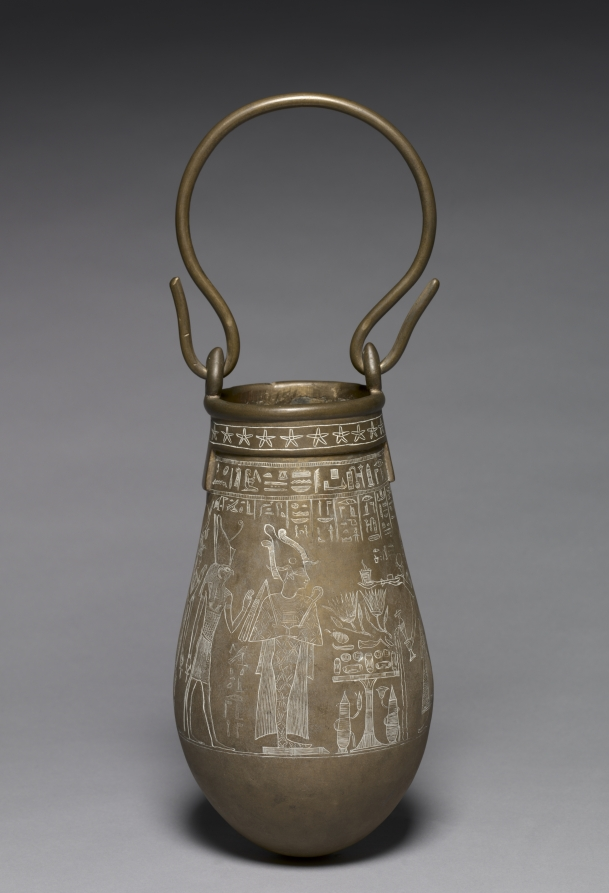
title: Decorated Situla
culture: Egypt, Greco-Roman period (332 BCE–395 CE), Ptolemaic dynasty (305–30 BCE)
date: 305–30 BCE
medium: bronze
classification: Vessels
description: The situla was a deluxe ritual vessel that played an important role in Egyptian religious ceremonies. The two scenes on this situla exemplify the dual roles of a pious Egyptian in the afterlife: receiving offerings from his family on the one hand and making offerings to the gods on the other. On one side of the vessel the deceased, Padiamennebnesuttawy ("He who Amen, lord of Karnak, gives"), sits in a low chair accompanied by his pet dog. The vertical, cross-shaped sign preceding the animal is his name, Nefer, meaning "good one" or "beautiful one." On the right, the deceased's eldest son, Amenhotep, makes offerings of incense and water to his father. On the other side the deceased demonstrates his piety by making an offering of round loaves of bread, vegetables, and meat to the gods. Opposite him are the gods who are the recipients of his offerings—Osiris, god of the dead; Horus, son of Isis; and Isis herself—each of whom wears elaborate beaded and feathered garments.